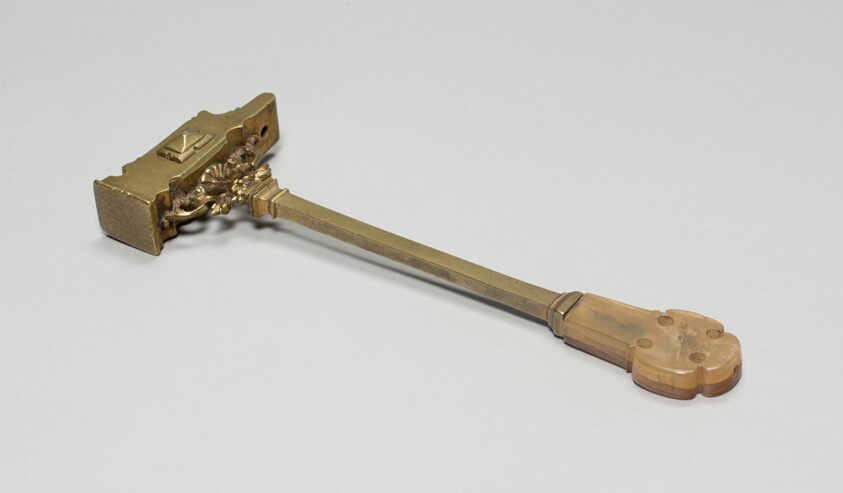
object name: Metalwork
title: Hammer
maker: Germany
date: 16th century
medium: Gilded bronze head and horn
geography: Germany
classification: tool; european decorative arts; metalwork